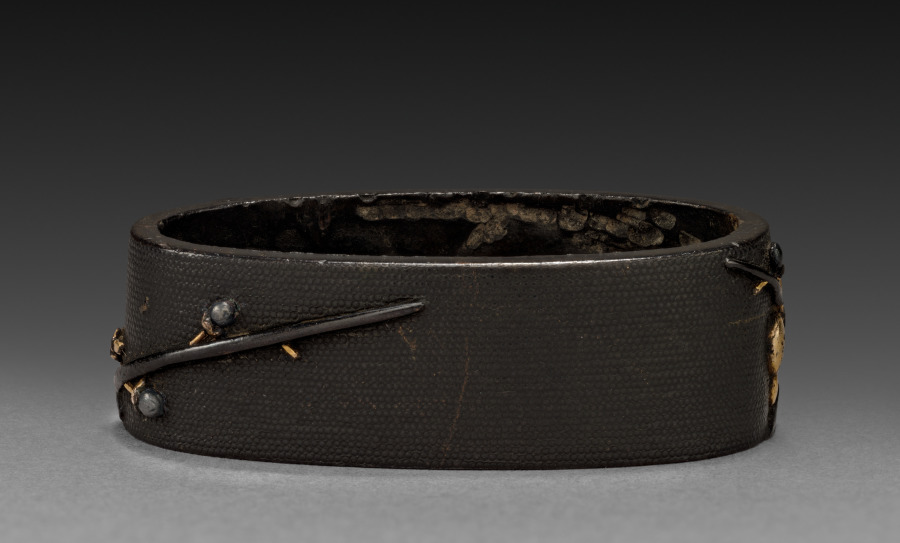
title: Sword-Hilt Collar (Fuchi)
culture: Japan, Edo period (1615–1868)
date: 1700–1850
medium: shakudo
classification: Arms and Armor